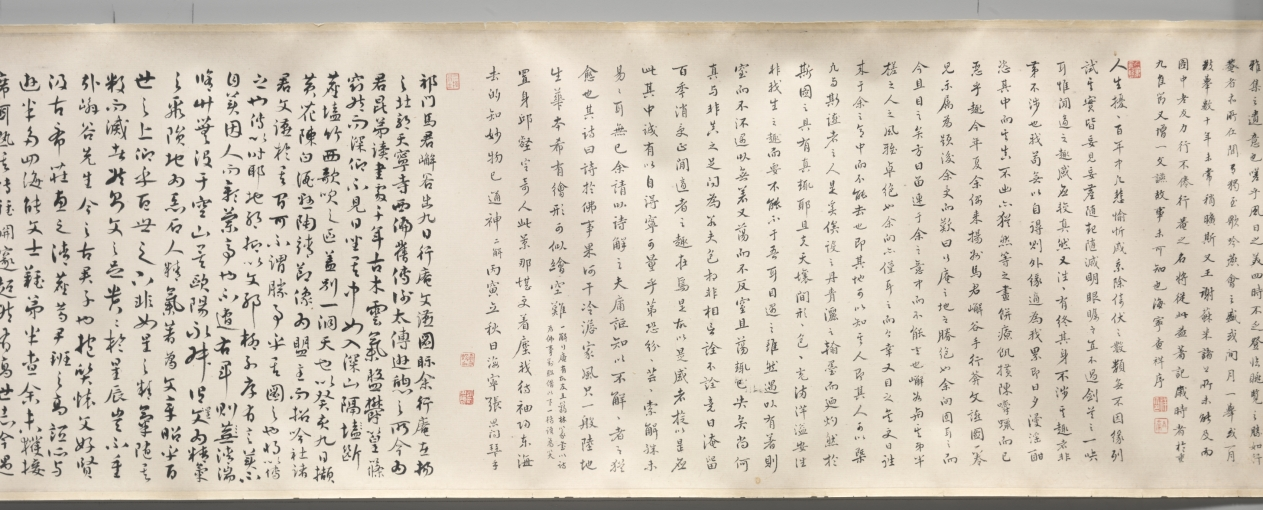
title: The Ninth Day Literary Gathering at Xing’an [Temporary Retreat]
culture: China, Qing dynasty (1644-1911)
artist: Fang Shishu (Chinese, 1693–1751)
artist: and Ye Fanglin (Chinese, active late 1600s–mid-1700s)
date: 1743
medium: Handscroll; ink and color on silk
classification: Painting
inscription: Fang Shishu's seal at beginning of painting: Ou ran shi de 偶然拾得. Ye Fanglin's seal at end of painting: Fanglin 芳林. Frontispiece title dated 1743 and 3 seals of Chen Bangyan 陳邦彦 (1678-1752).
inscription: 行庵在揚州北郭天寧寺西隅，馬君嶰谷半槎兄弟購僧房隙地所築，以為游息之處也。寺為晉謝太傅別墅。西隅饒古木，䨴鬱陰森，入林最僻，不知其近郛郭。庵居其中，無斲礱髤采之飾，惟軒庭多得清蔭，來憩者每流連而不能去。乾隆癸亥九日，積雨既收，風日清美，遂約同人，咸集於斯，中縣［懸］仇英白描陶靖節像，采黃花，酌白醪為供，乃以人世難逢開口笑，菊花雖插滿頭歸分韻賦詩。陶陶衎衎，觴詠竟日。既逾月，吳中寫真葉君敬［震］初適來，群貌小像，合為一卷，方君環山補景，命曰九日行庵文讌圖。裝池成，將各書所作於後，而囑鶚為之記。記按圖中共坐短榻者二人：右箕踞者，為武陵胡復齋先生期恆；左抱膝者，為天門唐南軒先生建中也。坐繩床者二人：中手牋者，歙方環山士庶；左仰首如欲語者，江都閔玉井華也。一人坐藤塾捻髭者，鄞全謝山祖望也。一人倚石坐若凝思者，臨潼張漁川四科也。樹下二人：離立把菊者，錢唐厲樊榭鶚；袖手者，錢唐陳竹町章也。一人憑石床坐撫琴者，江都程香溪先生夢星也。聽者三人：一人垂袖立者，祁門馬半查曰璐；二人坐瓷塾，左倚樹、右跂腳者，歙方西疇士疌 、汪恬齋玉樞也。二人對坐展卷者，左祁門馬嶰谷曰琯，右吳江王梅沂藻也。一人觀者，負手立於右，江都陸南圻鐘輝也。從後相倚觀者一人，歙洪曲溪振珂也。童子種菊者三人：樹間侍立者一人，撰杖、執卷者各一人。其植有蕉、有竹，又有雜樹，作丹黃青碧之色，紀時也。夫重九佳名，舉俗所重，而高常侍歎獨坐而搔首，陸天隨感登高以剫門，無其時地與人耳。今吾儕幸生太平，遇勝地，又皆素心有文之侶，固人世不可多得之會；而此十六人者，或土斷，或客游，聚散不常。異日者，歲月遷流，撫節物以有懷，一披此圖，悅如晤對。將來覽者，或亦不異此意乎。甲子夏五十有四日厲鴞記並書。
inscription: 揚州為江北大都會，居民連甍接楹，笙歌輿從，竟日喧聚，其於淸歌雅集，葢罕矣。城北天寧寺，為晉謝公駐節時所游息，其中有行庵，吾友馬君嶰谷、半查兄弟之小築也。地不踰五畝，而老樹古藤，森蔚相望，皆千百年物，間以修竹，春鳥秋蟲，更唱迭和，其間曲廊高榭，位置閑適。出門未數百步，即黃塵濁流極目，令人作惡。而此中獨蕭然有人外之思。乾隆八年九日，嶰谷兄弟招集同社一十四人祀陶公，出所藏仇實父白描像懸於閣上，各賦一詩。予方留滯西泠，未得預也。又踰旬而予至，諸君方擬繪圖記事，嶰谷曰：是不可無君。乃以展日更舉，令予得陪卷軸之末；而洪君曲溪，兩度皆以病失約，然故吟社中人也，亦補入焉。予太息謂諸君曰：謝公之風流，千古如在；然其游息於斯也，則與東山賓從之樂稍不同矣。公之為是行也，蓋以符氏之亂，思北定中原也。而其時公巳困於讒口，不自安於朝；雖在河朔極有可乘之會，而神明內索，徘徊不克自前。老師左次，竟無尺寸之功，坐失事幾。吾常過邵伯之埭，吊法雲之荒祠，未嘗不喟然累啼，以為明德之衰也。至若九日嘉名，陶公高格，固在羲皇懷葛之間；然而讀其 止酒之詩，蒼梧漢水之感，以瘦詞寄其孤憤則夫黃花白酒，蓋亦不得巳而漫與焉者。今吾輩生逢太平之日，書淫墨癖，是處留連，胸次中了無一事，為江湖之幸民，論人雖甚媿，論其時與地，則不可不私相慶也。諸君曰：善。圖之詳巳見於厲君樊榭記中。予之許為嶰谷兄弟序斯圖也，三年於茲；今夏重披圖捉筆，而唐丈南軒，巳化為異物矣。對酒當歌，人生幾何，願與諸君並日相遇從焉。丙寅夏杪孤山社小泉翁全祖望序。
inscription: 6 additional colophons and 15 additional seals: 1 colophon, dated 1746, and 1 seal of Huang Zhijun 黃之雋 (1668-after 1746); 1 colophon and 2 seals of Zha Xiang 查祥 (1718 jinshi); 1 colophon, dated 1746, and 3 seals of Zhang Siwen 張思問; 1 colophon, dated 1748, and 4 seals of Shao Dong 卲東 (1721 jinshi); 1 colophon, dated 1753, and 2 seals of Fang Shiju 方世舉 (signing as Fang Funan 方扶南); 1 colophon, dated 1808, of Ruan Yuan 阮元 (1764–1849); 3 seals unidentified.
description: By the 1700s, Yangzhou was flourishing both economically and culturally as the most prosperous city in China, having surpassed all other Jiangnan cities in their creation of gardens. This group portrait commemorates a literary gathering in the private garden of the salt merchants and art patrons Ma Yueguan (1688–1755) and his brother Ma Yuelu (1697–after 1766) in Yangzhou. Ma Yueguan received imperial recognition for providing financial aid and food relief for those affected by flood and drought. Ma Yueguan is seen seated at the end of the painting holding an open scroll while Ma Yuelu stands behind the qin instrument player. Among the guests were officials, scholars, poets, painters, and merchants, a mix of local members of a poetry club reflecting increasing social diversity.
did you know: The two hosts and their fourteen guests were all officials, scholars, poets, painters, and salt merchants.